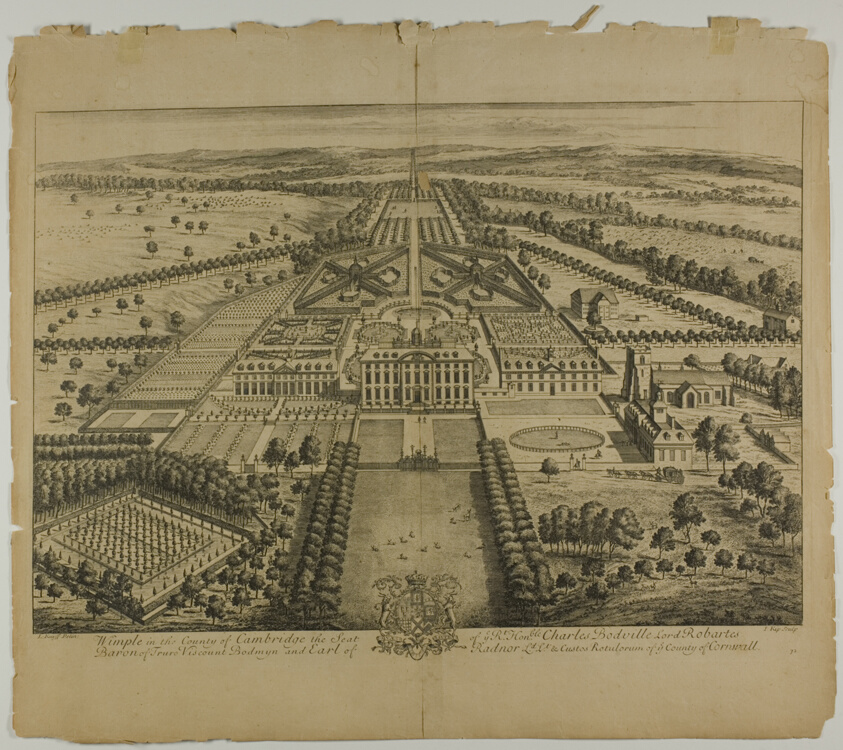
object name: Print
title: Wimple in the County of Cambridge, plate 32 from Britannia Illustrata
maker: Jan Kip (Dutch, c. 1653-1722); after Leonard Knyff (Dutch, 1650-1721); published by David Mortier (French, 1673-1728)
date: published 1707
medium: Etching, with engraving, in black on cream laid paper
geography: Netherlands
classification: prints and drawing; engraving; etching; print